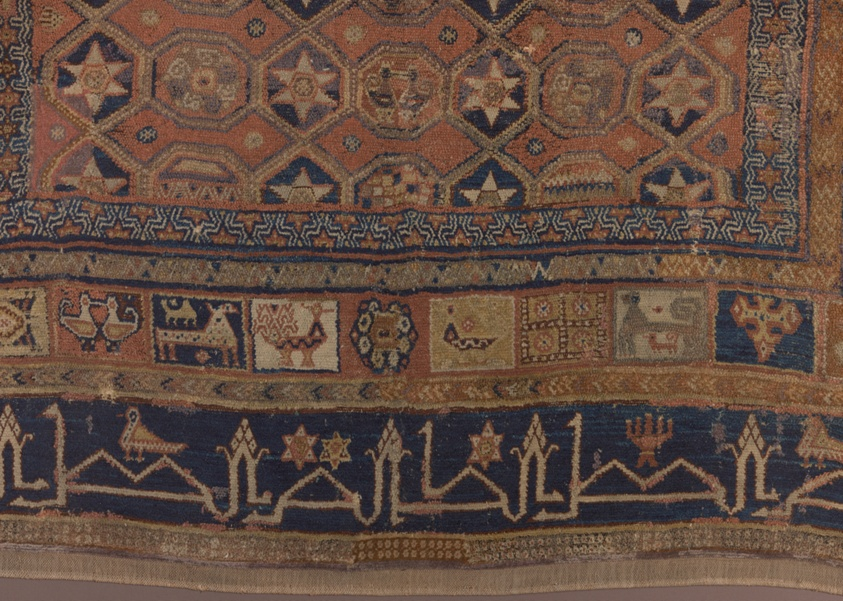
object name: Textile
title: Carpet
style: hispano-moresque, medieval, european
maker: Hispano-Moresque; Spain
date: Before 1473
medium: Wool, plain weave with supplementary wefts forming cut pile through a technique known as "Spanish knots"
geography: Spain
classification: weaving - carpet; textile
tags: geometric motif, abstract figures, animals, birds, cross motif, script, stars